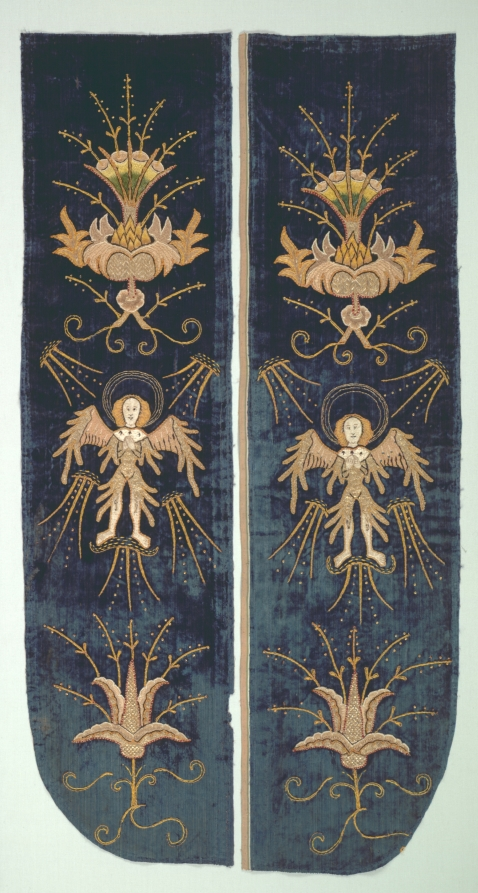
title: Part of a Chasuble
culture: England, London (embroidery) and Italy, Florence (velvet), early 16th century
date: c. 1500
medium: Silk, gold filé; appliqué, embroidery: couching stitches Velvet: solid pile, silk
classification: Embroidery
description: Although missing the central decorative band, these two velvet panels embroidered with angels and thistles originally formed part of the back of an ecclesiastical chasuble. The term opus anglicanum, or English work, refers to English embroidery dating from the 1100s through the 1500s, like this example. Made primarily in embroidery guilds in London, it was in great demand for royal and ecclesiastical garments and furnishings throughout Europe.